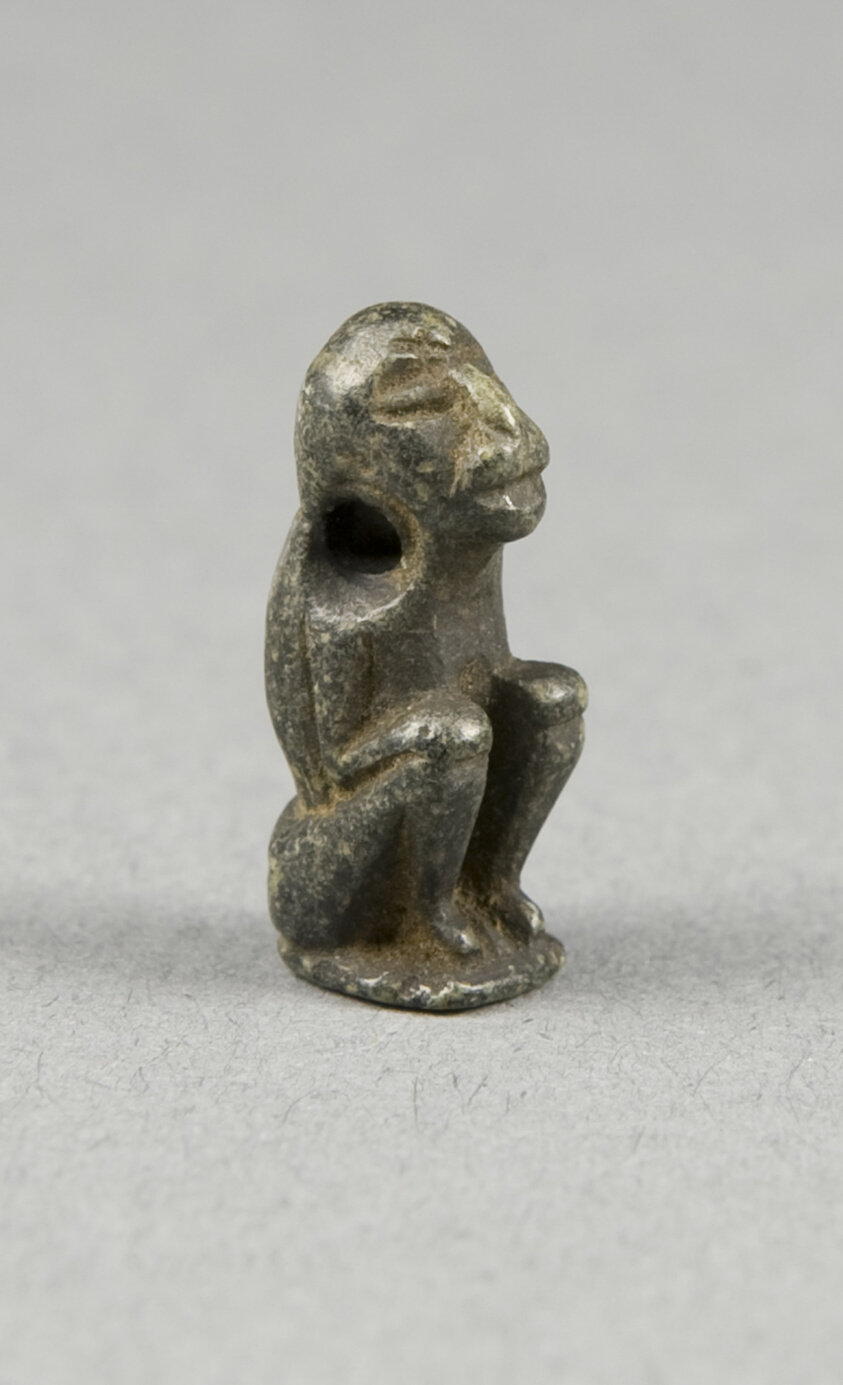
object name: Costume and Accessories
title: Amulet of a Seated Ape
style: egyptian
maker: Egyptian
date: Middle Kingdom (?) (about 1700 BCE)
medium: Steatite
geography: Egypt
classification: amulet; jewelry; stone; ancient art; costume